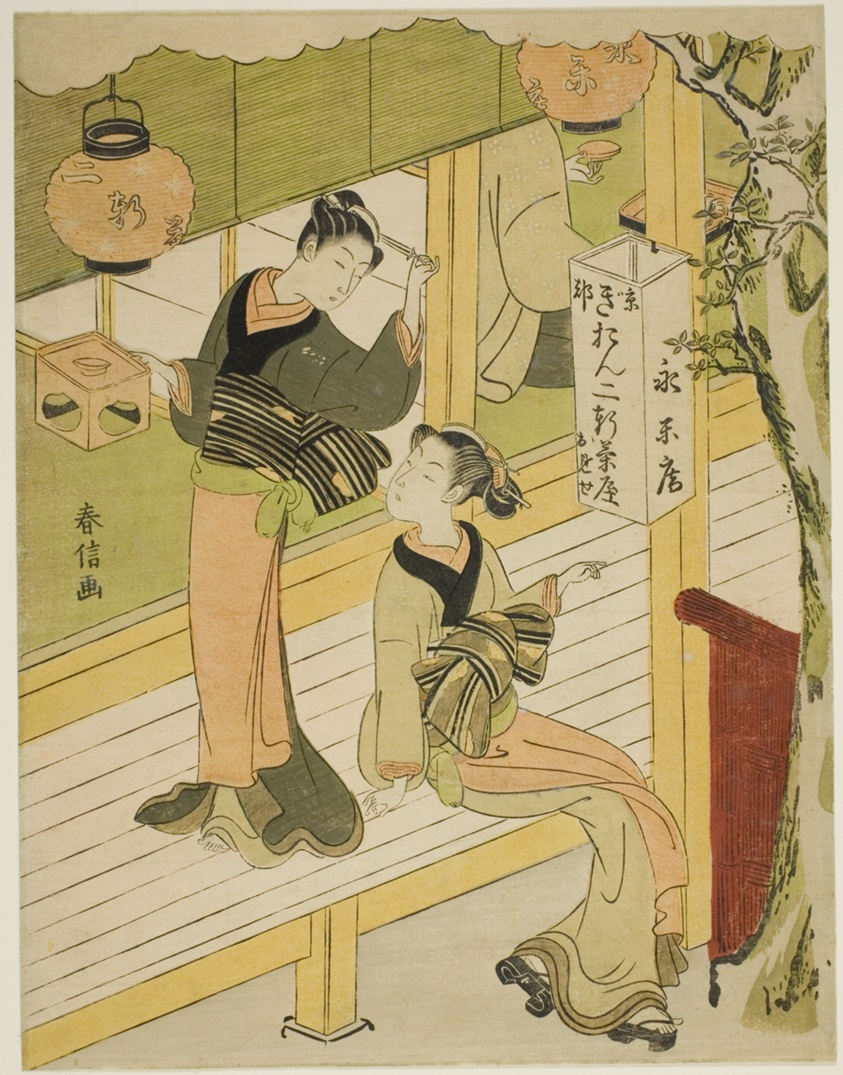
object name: Print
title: The Eiraku-an teahouse in Kyoto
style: Japanese (culture or style)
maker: Suzuki Harunobu 鈴木 春信; Japanese, 1725 (?)-1770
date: c. 1768/69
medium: Color woodblock print; chuban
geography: Japan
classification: woodblock print; print; asian art